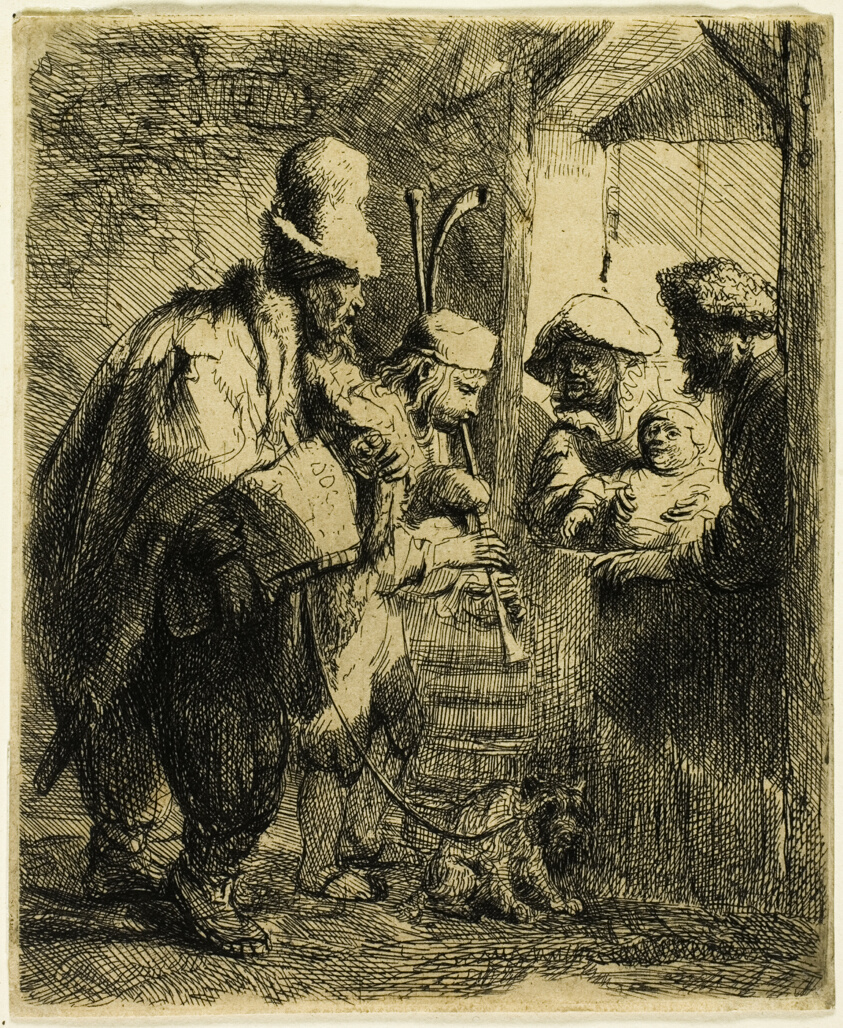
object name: Print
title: The Strolling Musicians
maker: Rembrandt van Rijn (Dutch, 1606-1669)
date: c. 1635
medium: Etching in black on tan laid paper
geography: Holland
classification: etching; print; prints and drawing; paper